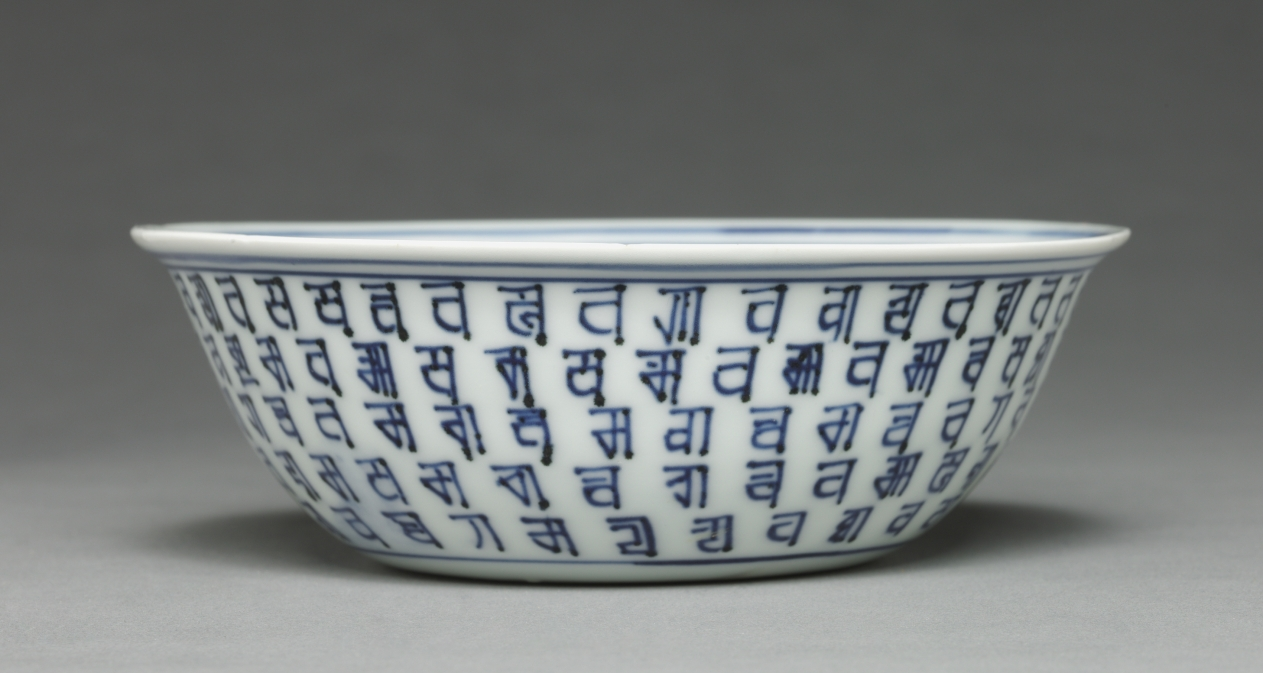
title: Bowl with Bands of Tibetan (Lança) Characters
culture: China, Jiangxi province, Jingdezhen kilns, Ming dynasty (1368-1644), Wanli mark and reign (1573-1619)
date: 1572–1620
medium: porcelain with underglaze blue decoration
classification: Ceramic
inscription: 大明萬曆年製